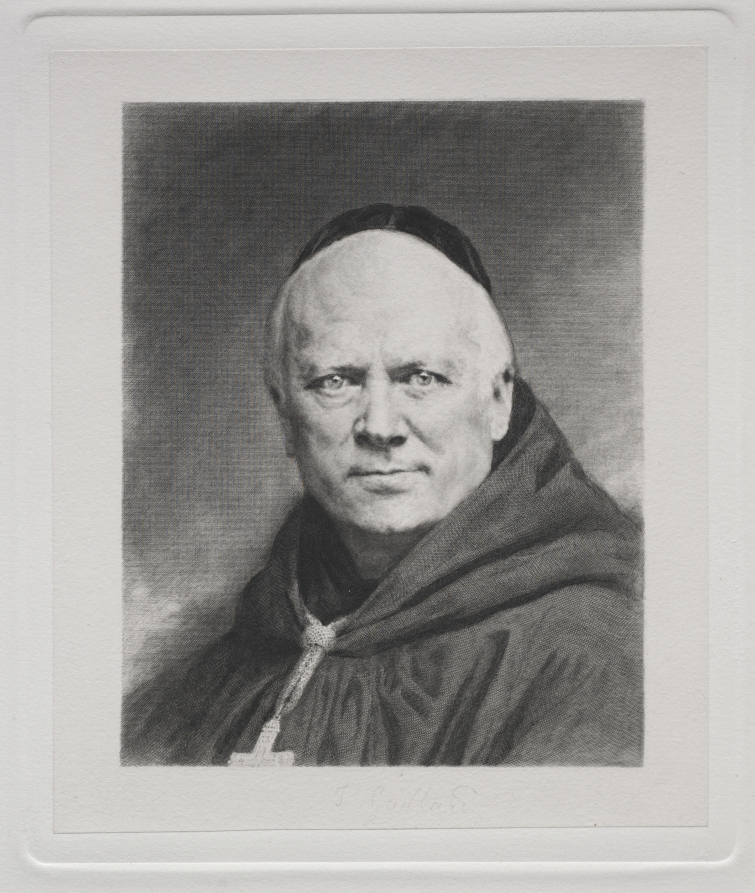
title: Dom Prosper Gueranger, Abbe of Solesmes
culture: France, 19th century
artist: Claude-Ferdinand Gaillard (French, 1834–1887)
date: c. 1878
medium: engraving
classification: Print